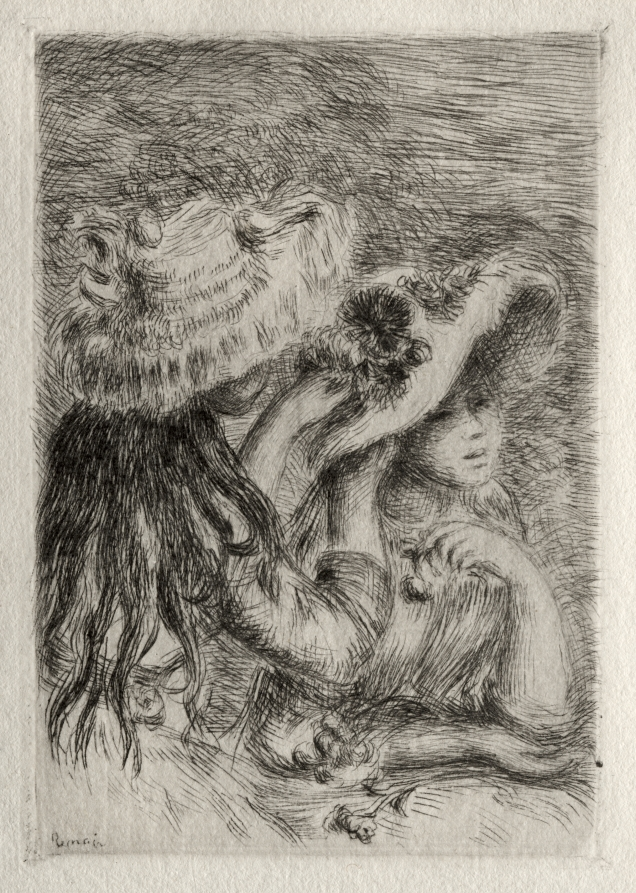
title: Le Chapeau epinglé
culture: France, late 19th-early 20th Century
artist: Pierre-Auguste Renoir (French, 1841–1919)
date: 1894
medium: etching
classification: Print